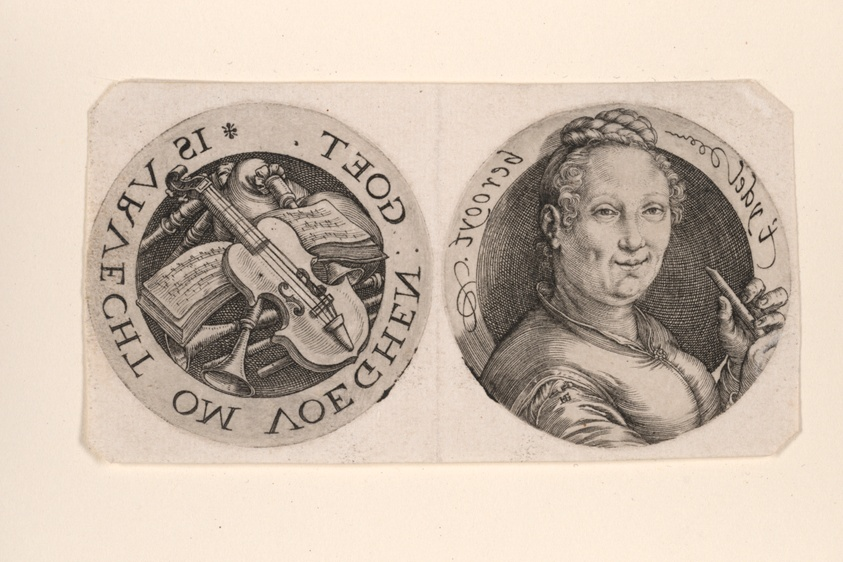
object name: Print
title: Bust of a Woman holding a Flute, and Musical Instruments, on one sheet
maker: Hendrick Goltzius (Dutch, 1558–1617)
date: 1580/90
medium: Engraving on paper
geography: Netherlands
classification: engraving; paper; print; prints and drawing